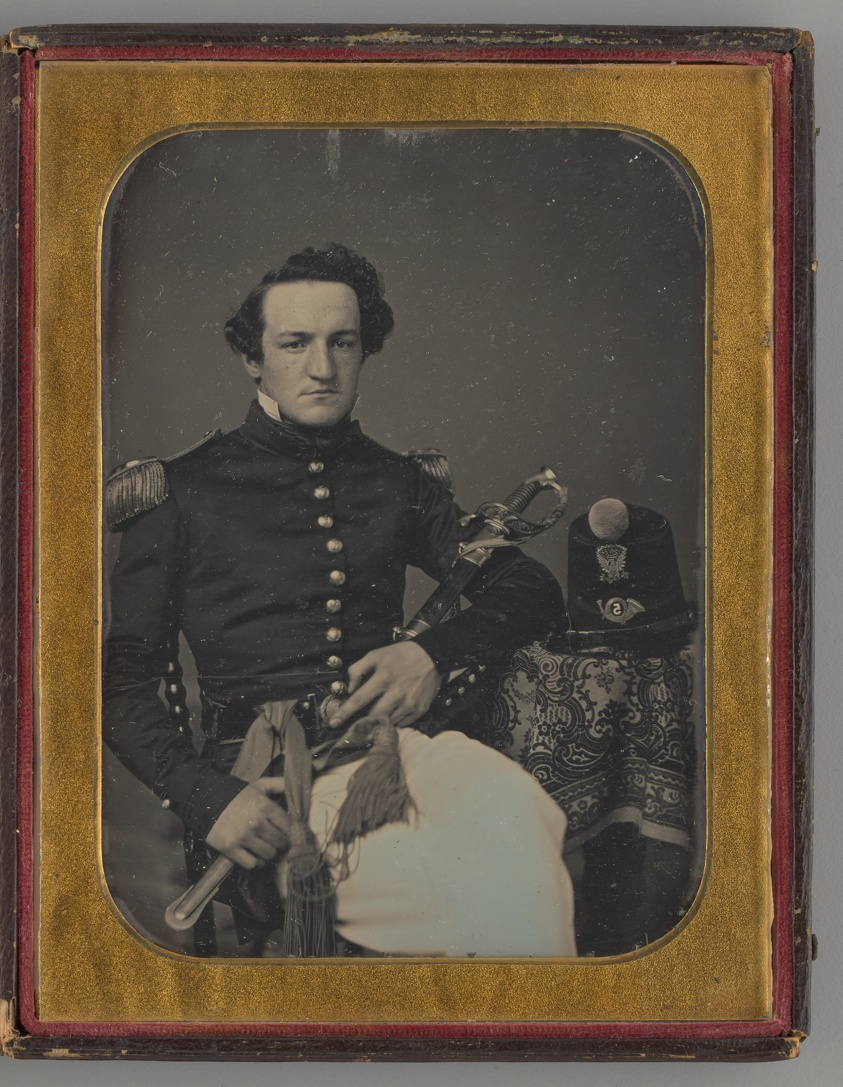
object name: Photograph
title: Untitled (Portrait of a Seated Man)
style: 19th century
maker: Marcus Aurelius Root (American, 1808-1888)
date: 1855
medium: Daguerreotype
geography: United States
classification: portrait; daguerreotype; portrait; photograph; photographic process; photography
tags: lundberg collection